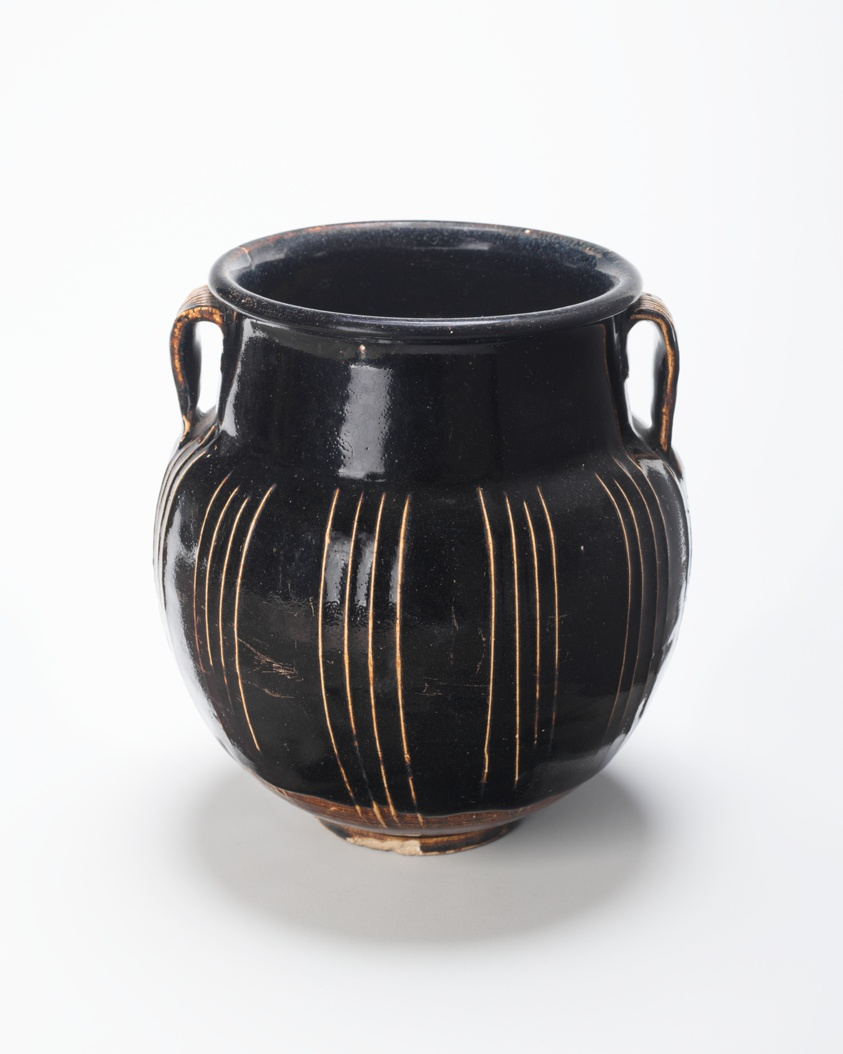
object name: Vessel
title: Ovoid Jar with Vertical Ribs and Two-Loop Handles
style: Chinese (culture or style)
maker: China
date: Northern Song (960–1127) or Jin dynasty (1115–1234), 12th/13th century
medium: Northern black ware; Cizhou type; glazed stoneware with trailed white slip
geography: China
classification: stoneware; asian art; ceramics; vessel